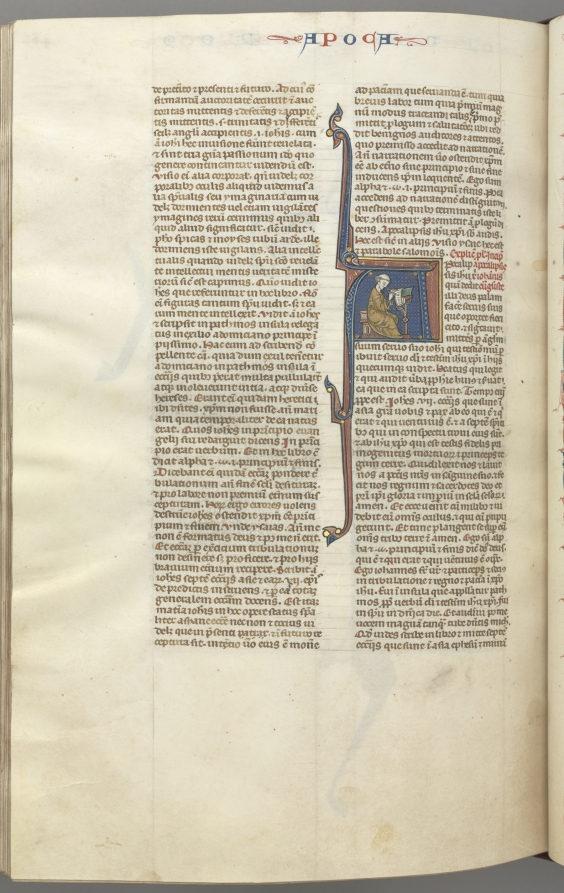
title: Fol. 482v, Revelations, historiated initial A, John seated at a desk writing to the Seven Churches of Asia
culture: Southern France, Toulouse(?), 13th century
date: c. 1275–1300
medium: ink, tempera and gold on vellum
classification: Bound Volume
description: Biblical manuscripts were highly prized and important possessions of churches, monasteries, cathedral schools, and universities throughout medieval Europe. The biblical texts were known as the vulgate, the translations made by Saint Jerome in the fourth century from Hebrew and Greek into Latin, which became the definitive and official Latin version of the Roman Church. In the 13th century, the bible was, for the first time, produced as a single volume with an officially sanctioned sequence to its books and chapters as illustrated by this example. The very extensive decoration of this bible is arranged hierarchically to indicate the relative importance of the various texts so that full or almost full-page initials mark the openings of the first prologue, Genesis, and the first Gospel; historiated initials mark the beginning of each book and illuminated initials mark the Prologues.